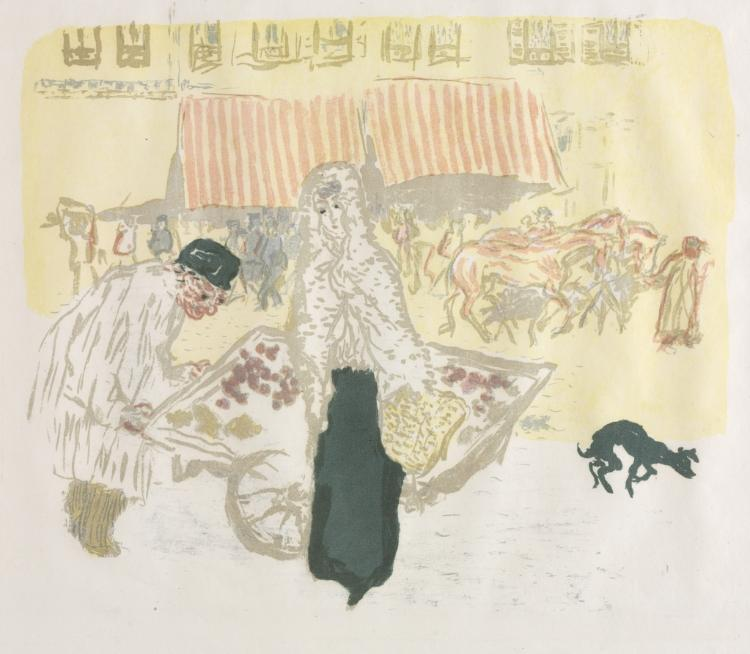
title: The Costermonger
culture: France, 19th century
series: Some Scenes of Parisian Life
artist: Pierre Bonnard (French, 1867–1947)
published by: Published by Ambroise Vollard; Printed by Auguste Clot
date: 1899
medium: lithograph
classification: Print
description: This suite of color lithographs collected Pierre Bonnard’s observations of city life, ranging from animated street scenes to distant observations glimpsed from the artist’s Montmartre studio window. Rather than memorializing the famous monuments of Paris, Bonnard preferred to depict small neighborhood scenes populated by urbanites shopping and strolling and by vendors selling their wares. The setting for one of the prints is the second-largest public park in Paris, the Bois de Boulogne, which was a popular place for families to relax, stroll, and enjoy carriage rides around the lakes. Two prints are nocturnal scenes in which gaslight emanating from shop windows is reflected on the wet streets, creating passages of bright yellow in the otherwise dark compositions. Bonnard’s favorite subjects, such as the Parisienne—a young, fashionable, modern woman—as well as children and dogs, appear repeatedly throughout the prints in the suite.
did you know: The costermonger seen here sold fruits and vegetables from a cart on Paris's streets.